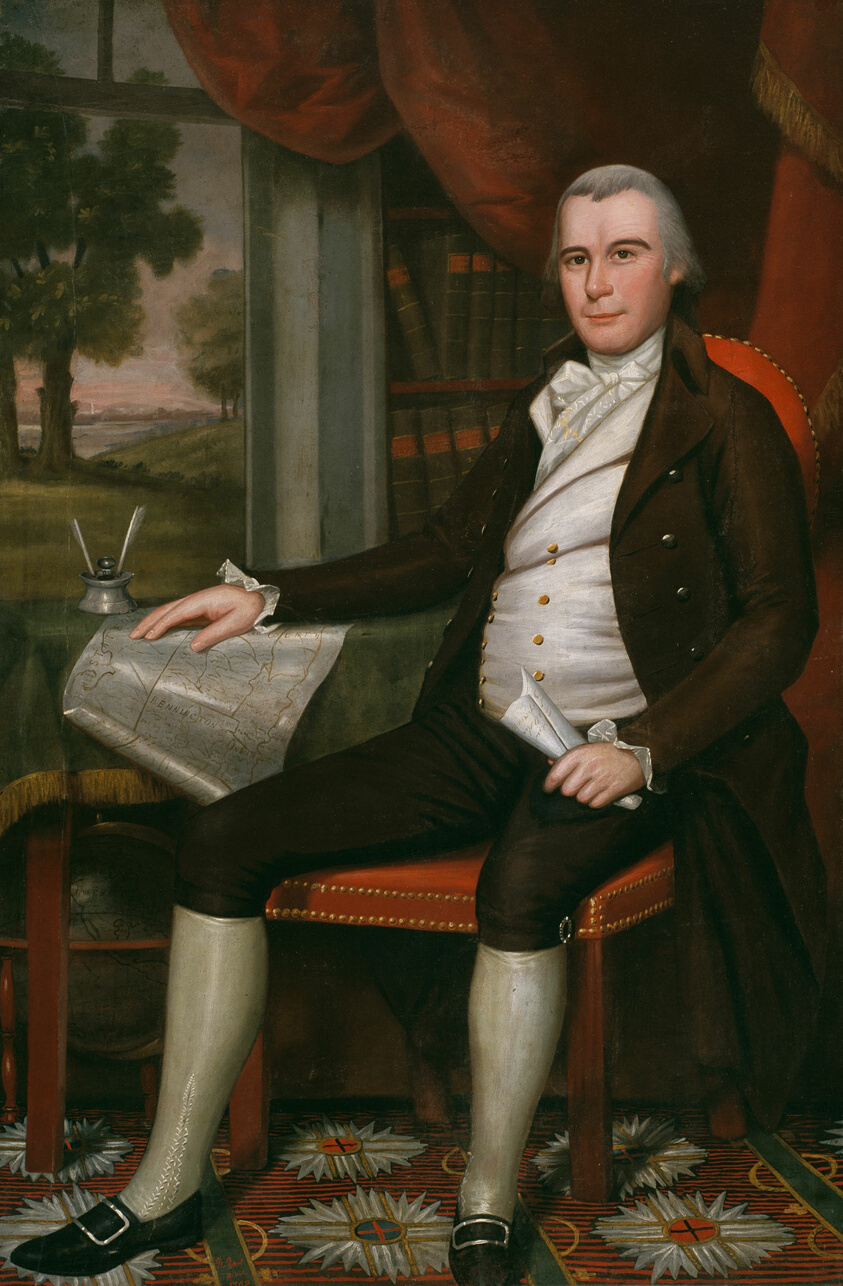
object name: Painting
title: Noah Smith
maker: Ralph Earl (American, 1751–1801)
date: 1798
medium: Oil on canvas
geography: Bennington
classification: painting; american arts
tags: fashion, men, maps, portraits, people